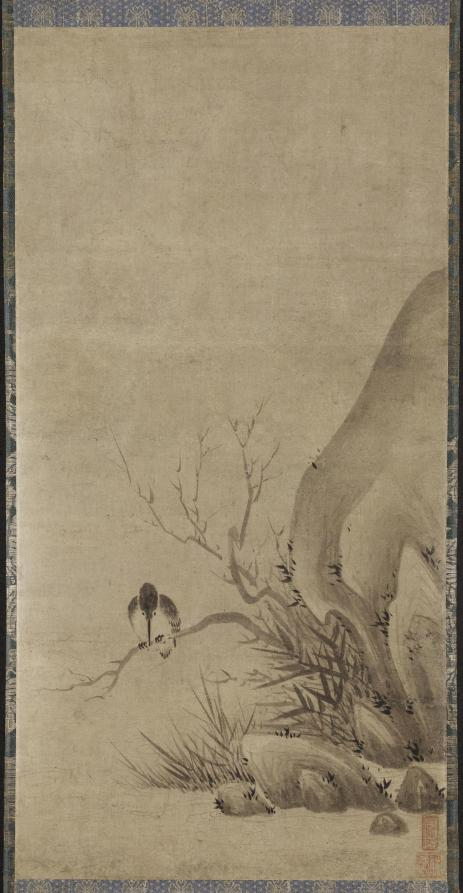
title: Kingfisher Perched above a Stream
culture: Japan, Muromachi period (1392–1573)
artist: Kenkō Shōkei (Japanese, active 1478–1506)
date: late 1400s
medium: hanging scroll; ink on paper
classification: Painting